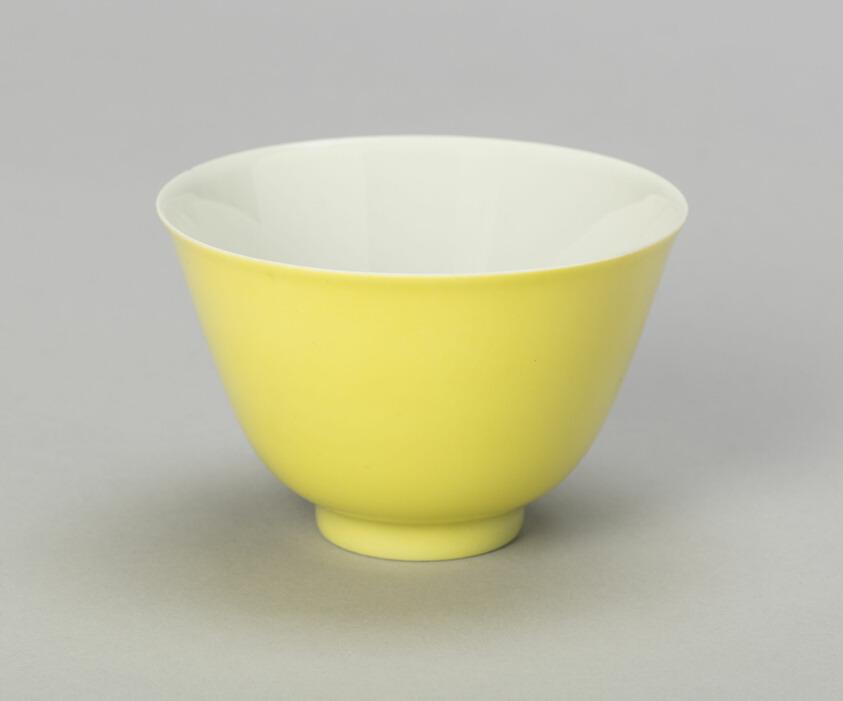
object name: Vessel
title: Cup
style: Chinese (culture or style)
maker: China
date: Qing dynasty (1644–1911), Yongzheng reign mark and period (1723–1735)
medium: Porcelain painted in overglaze enamel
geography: China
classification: drinking vessel; porcelain; asian art; ceramics; vessel